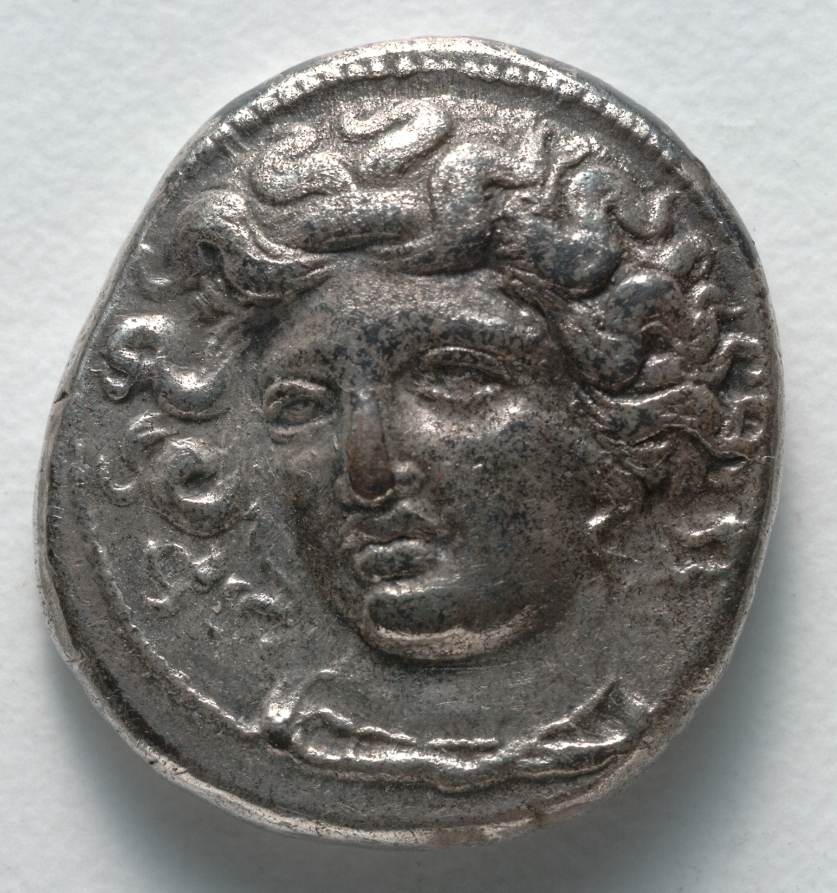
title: Drachma: Head of Larissa (Nymph) (obverse)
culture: Greece, Thessaly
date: c. 375–320 BCE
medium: silver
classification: Coins